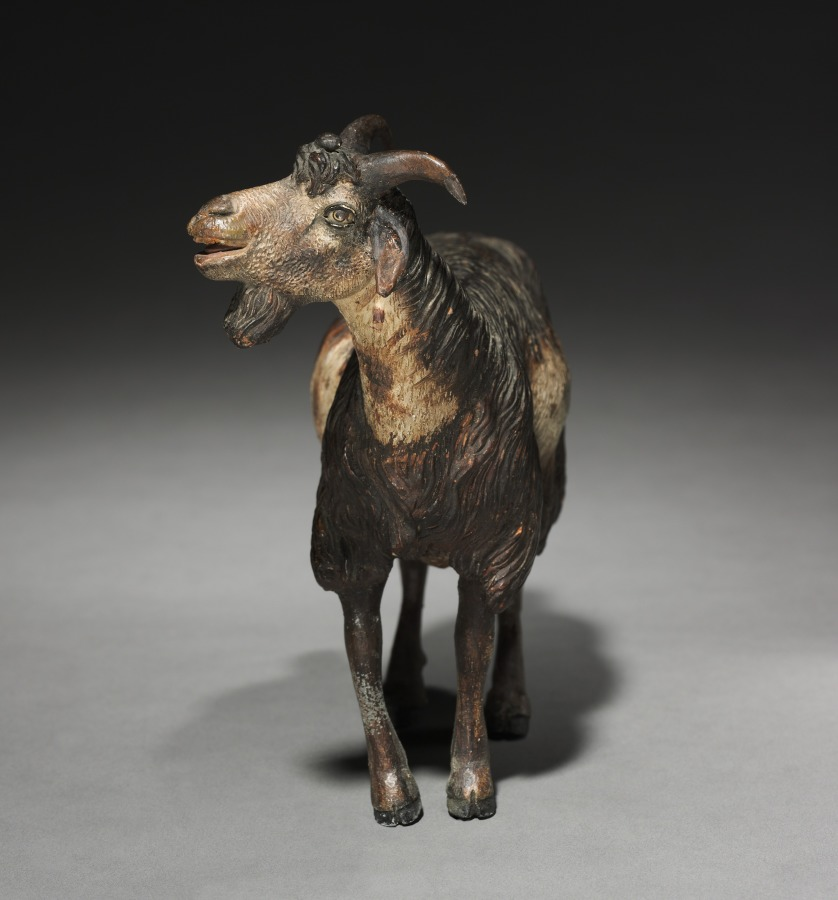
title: Figure from a Crèche: Standing Mountain Goat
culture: Italy, Naples, late 18th-early 19th century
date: 1780–1830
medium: painted wood and terracotta with various textiles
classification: Sculpture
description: The practice of creating scenes of the Nativity for the home dates from the early 1700s in Italy, where people began to set up doll-like figures of about a foot or less in height. The custom was particularly popular in Naples around 1800, where crèche scenes (crèche means cradle, or crib) included many figures, whose heads and hands of painted terracotta, stuffed cloth bodies, and clothing adapted from contemporary local costumes gave them an amazingly realistic character. Representations of the birth of Jesus can be traced to the first few centuries of Christianity. Both living creatures and sculptural depictions of them were used from early times. By the late middle ages it was customary to create life-size figures of wood or stone, naturalistically painted, to represent the characters who participated in the events of Jesus's early life. These sculptures were then arranged in scenes illustrating one or both of the most important of these events, the Adoration of the Shepherds and the Adoration of the Magi-the three kings from the East who came to pay homage to the Christ child. Used in churches, these large figures were especially popular in Italy, Central Europe, Spain, and Portugal. This Object in Focus presentation was organized by Henry Hawley, Curator of Renaissance and Later Decorative Arts and Sculpture.